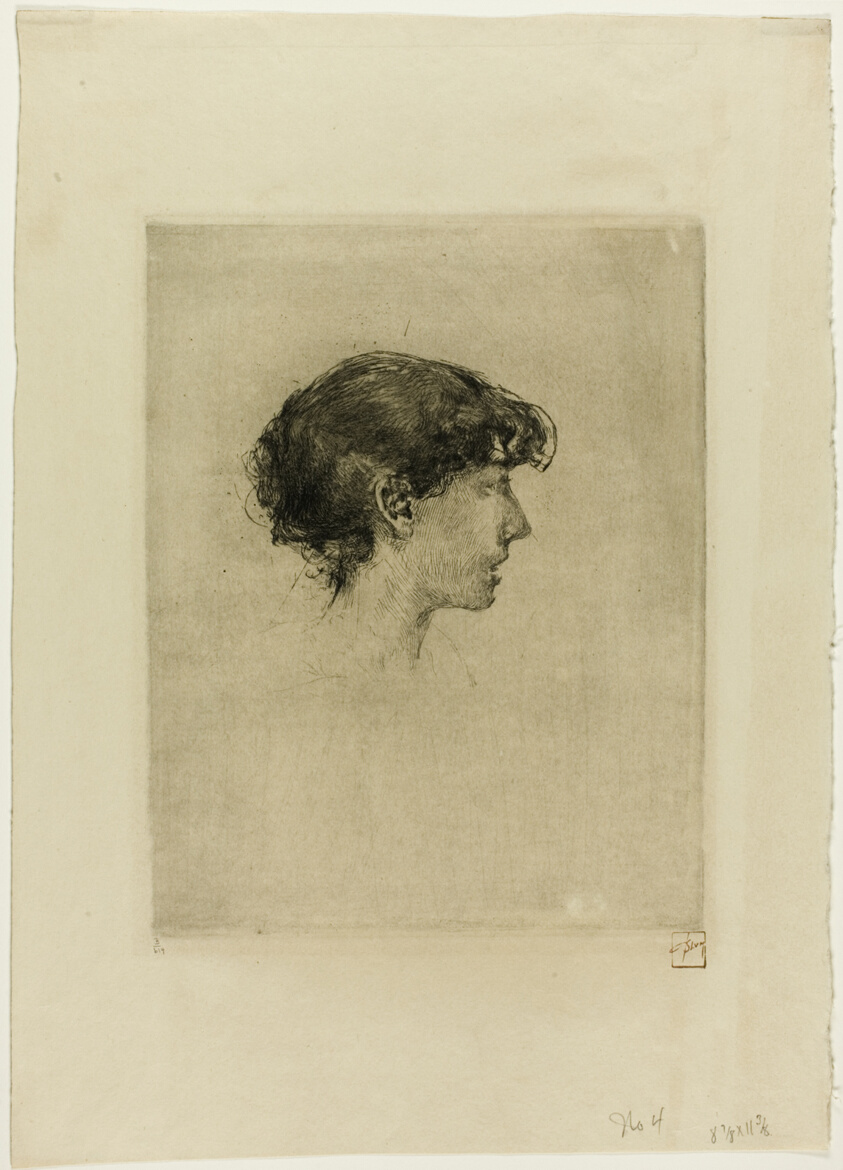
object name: Print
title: Head of a Girl, Profile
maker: Robert Frederick Blum (American, 1857-1903)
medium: Etching on cream wove paper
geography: United States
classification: etching; print; prints and drawing